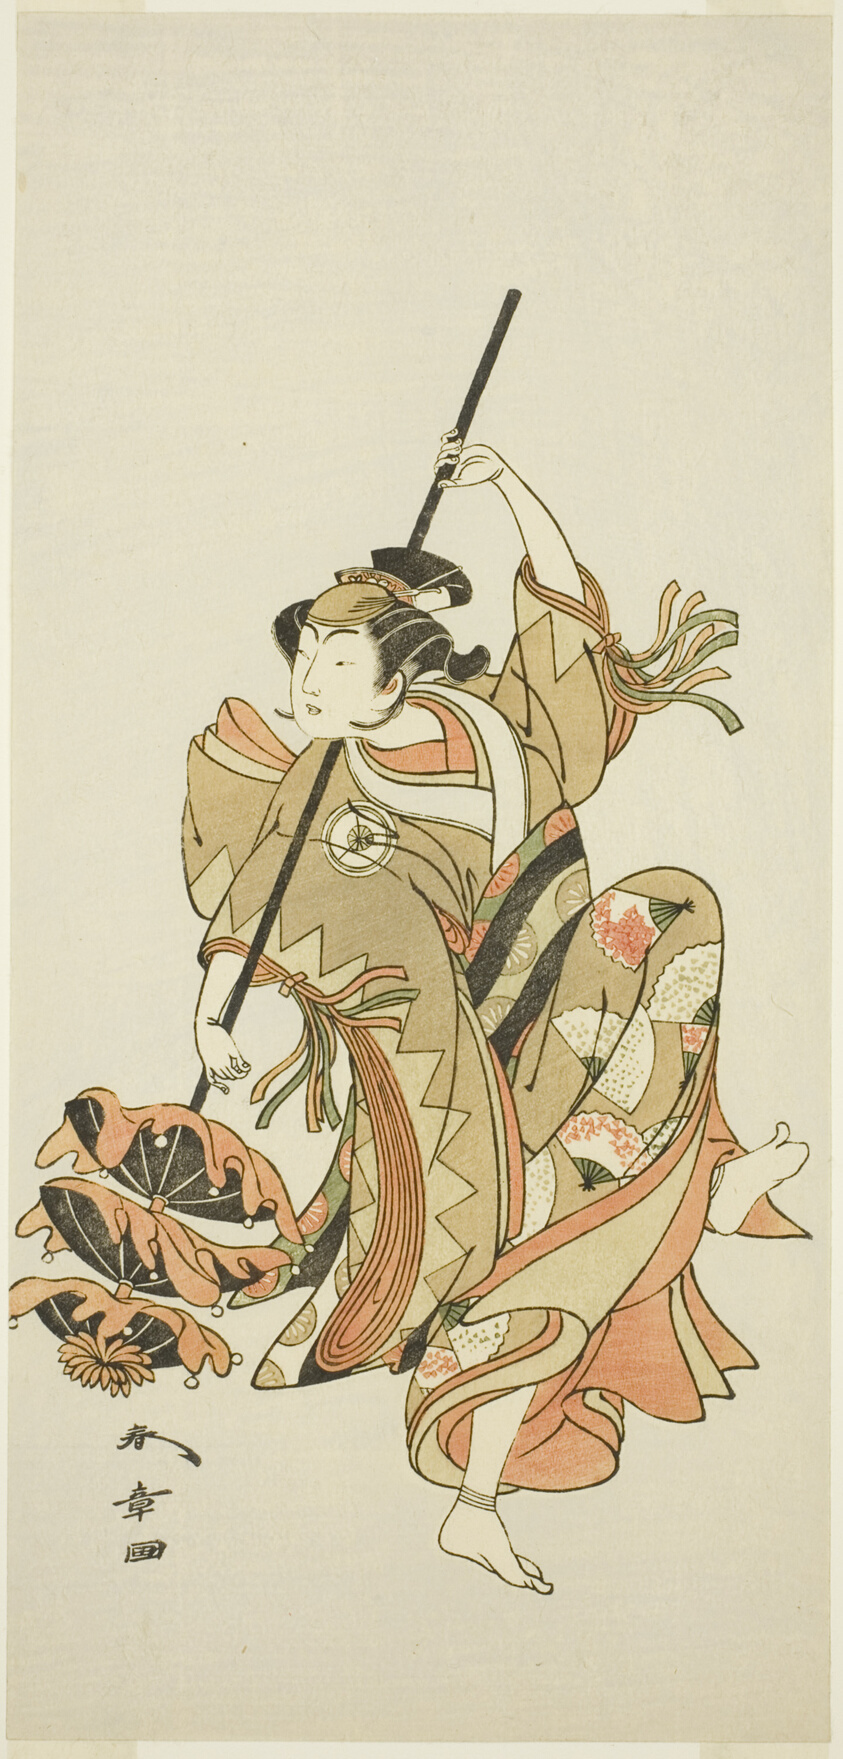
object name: Print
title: Actor Iwai Hanshirô IV Performs the Triple Umbrella Dance in “Flower of Japan: Ono no Komachi’s Five Characters” (“Kuni no Hana Ono no Itsumoji”)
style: Japanese (culture or style)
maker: Katsukawa Shunshô 勝川 春章; Japanese, 1726-1792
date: About 1771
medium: Color woodblock print; hosoban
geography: Japan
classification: woodblock print; print; asian art